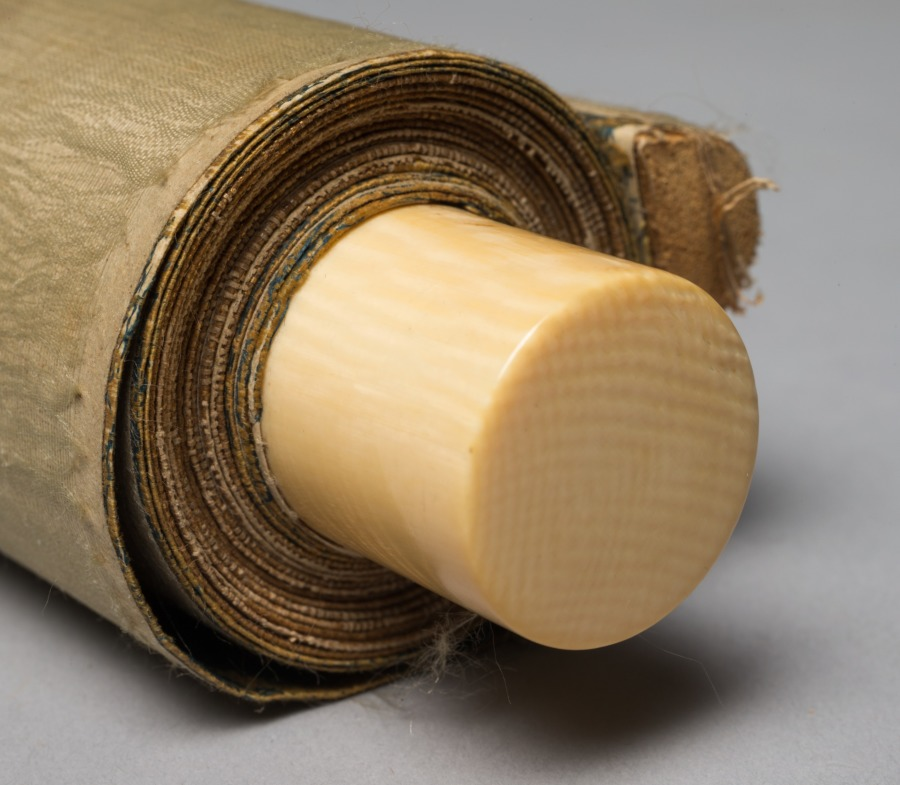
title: A Sage with Tiger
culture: Japan, Edo period (1615–1868)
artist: Kano Tan’yū (Japanese, 1602–1674)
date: 1661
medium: One of a triptych of hanging scrolls; ink and slight color on silk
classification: Painting